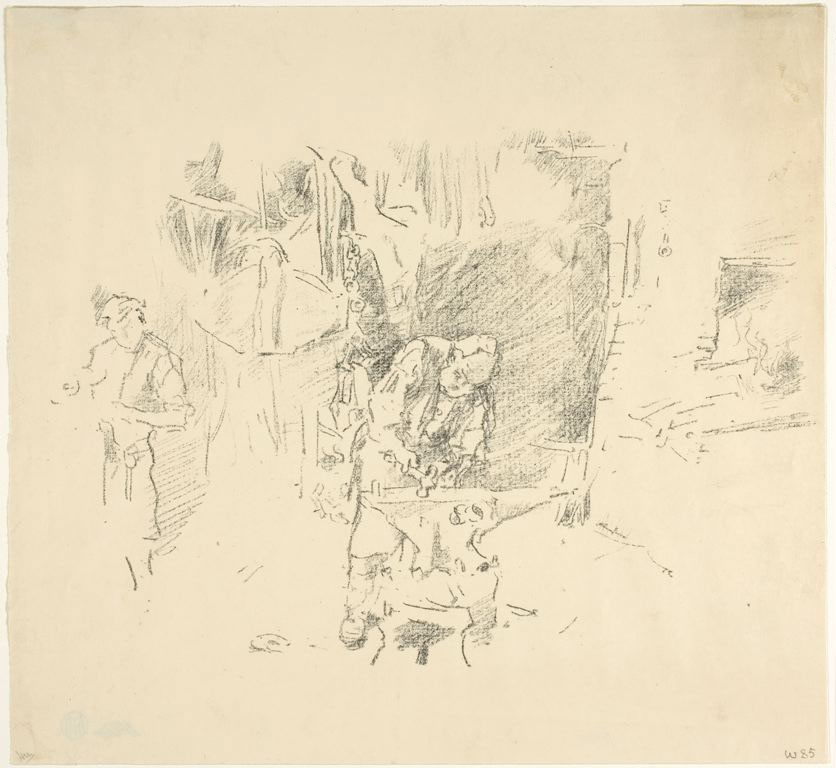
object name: Print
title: The Sunny Smithy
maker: James McNeill Whistler (American, 1834-1903)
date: 1895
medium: Lithograph on cream wove paper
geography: United States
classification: prints and drawing; print; lithograph; paper